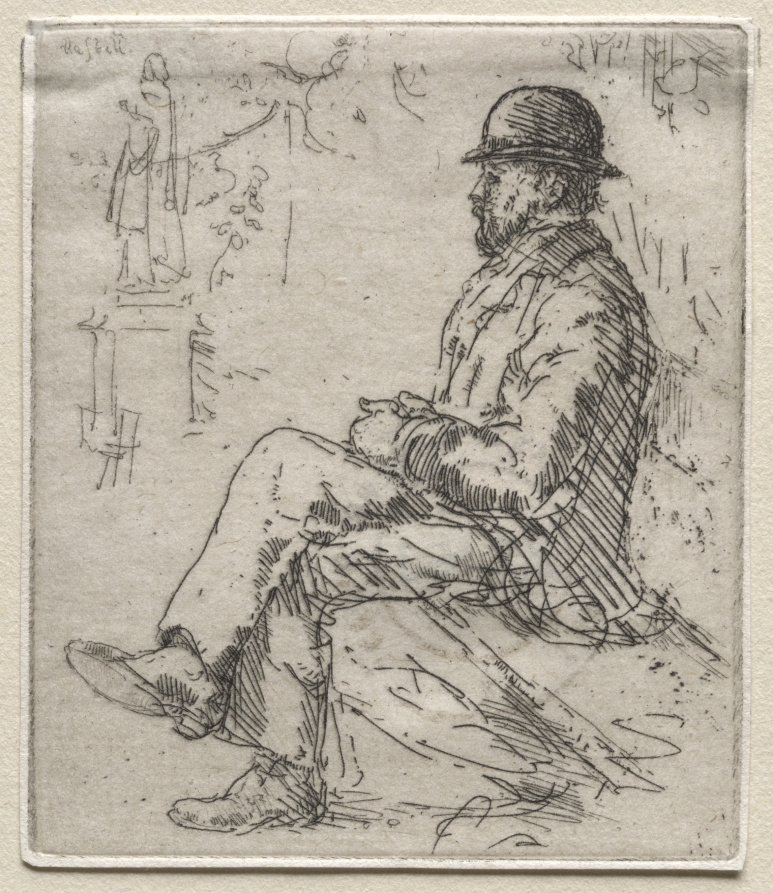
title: Paris: In the Luxembourg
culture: America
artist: Ernest Haskell (American, 1876–1925)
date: 1910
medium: etching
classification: Print